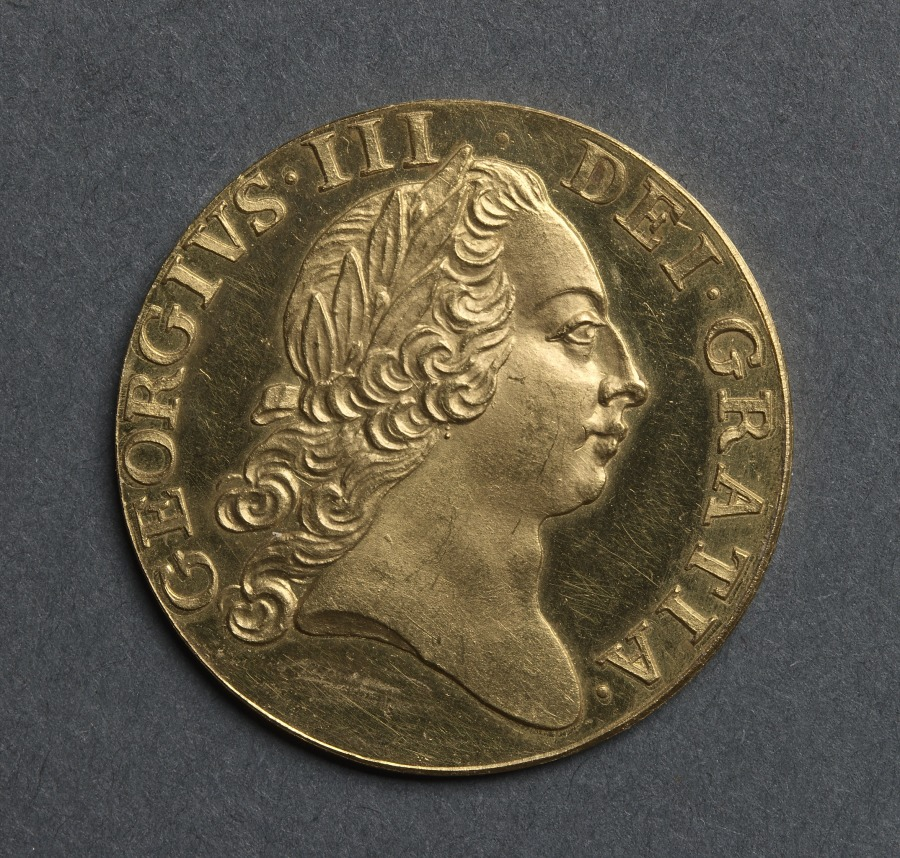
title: Guinea: George III (obverse); Shield of Arms (reverse)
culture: England, George III, 1760-1820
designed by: Richard Yeo (British, 1720–1779)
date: 1761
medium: gold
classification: Coins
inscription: DEI . GRATIA . GEORGIVS . III .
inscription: M.B.F.ET.H.REX.F.D.B.ET.L.D.S.R.I.A.T.ET.E.1761.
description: No five- or two-guinea pieces were issued for general circulation during this reign, but there were large numbers of guineas, the unit piece. The reign saw a profusion of pattern and proof pieces being struck, mostly because a further coinage reform was imminent, as was the removal of the Royal Mint from the Tower of London, where there had been a mint for over 600 years. Richard Yeo was appointed assistant engraver at the Royal Mint in 1749, chief engraver in 1775, and died in 1779. He was responsible for a large number of pattern pieces and for some of the currency coins of the period. This coin, one of the earliest patterns of the reign, bears a portrait on the obverse similar to that of George II rather than George III.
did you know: Richard Yeo first came to notice in 1746, when he produced the official medal for the battle of Culloden.